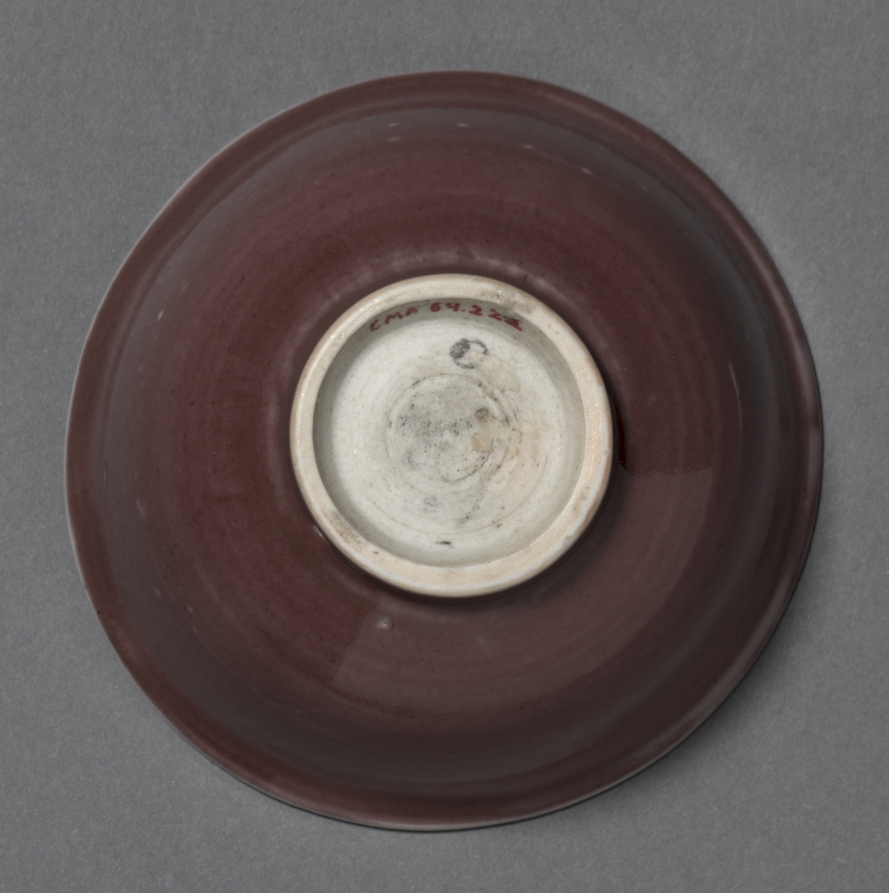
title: Bowl with Dragons and Clouds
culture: China, Jiangxi province, Jingdezhen, Ming dynasty (1368-1644), Hongwu period (1368-98)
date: 1368–98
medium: porcelain with molded and incised decoration and copper-red glaze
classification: Ceramic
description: Fragments of bowls with unglazed foot rings and molded and incised ornament very similar to this extremely rare piece have been excavated at the early Ming dynasty site of the Hongwu palace at Nanjing.